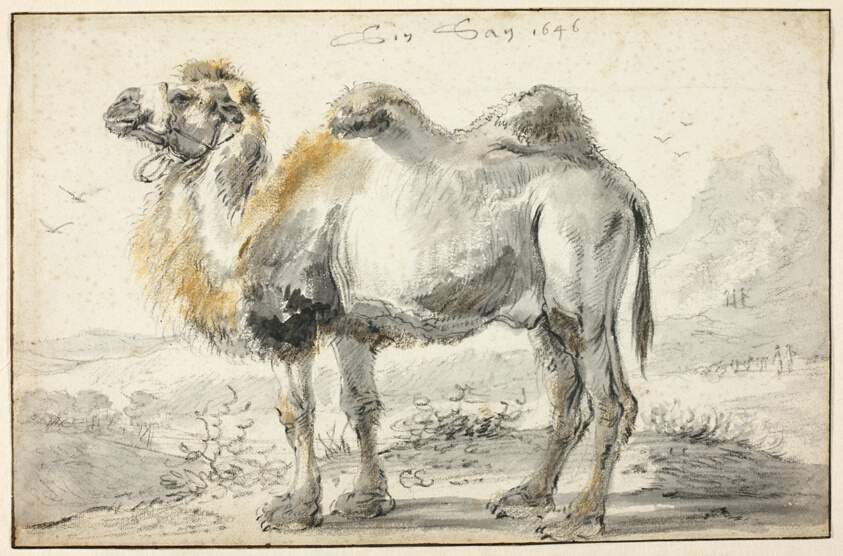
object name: Drawing and Watercolor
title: A Camel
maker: Cornelis Saftleven (Dutch, 1607-1681)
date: 1646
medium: Black chalk and brush and black wash, with touches of brown and ochre chalk, on ivory laid paper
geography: Holland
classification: ink or chalk wash; drawings (visual works); prints and drawing